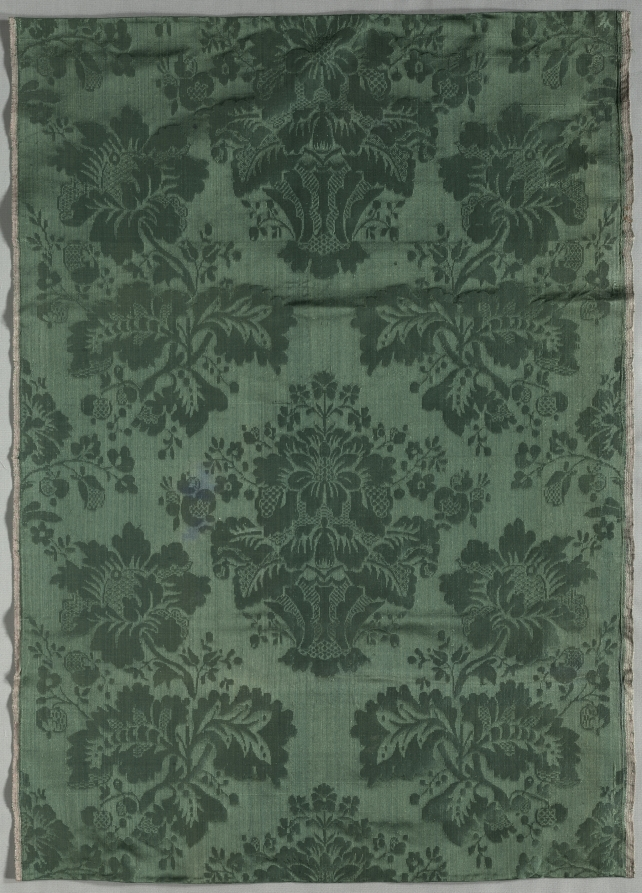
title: Length of Silk Damask Textile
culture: Italy, 18th century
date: 1700s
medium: damask, silk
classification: Textile